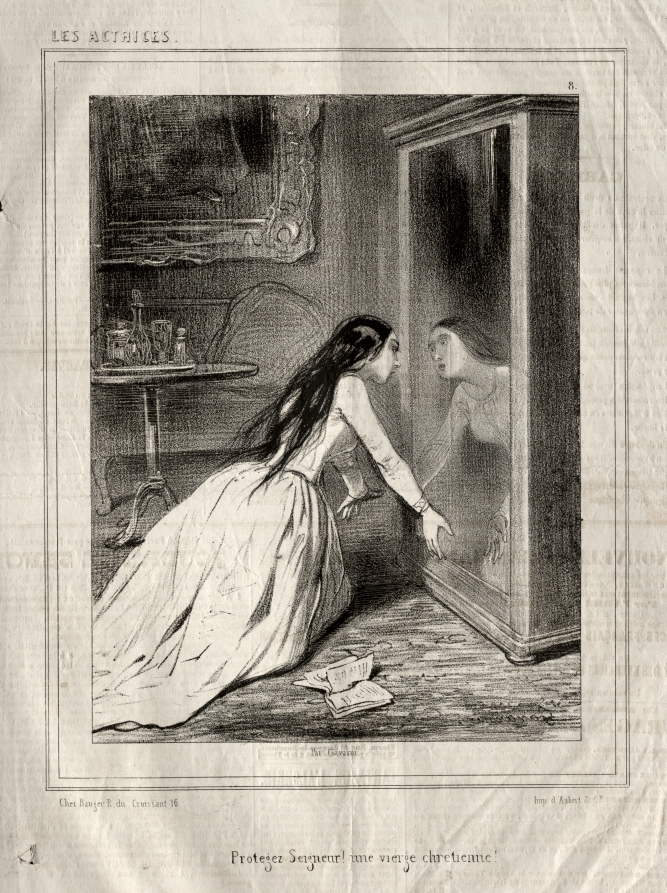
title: Les Actrices: Protegez Seigneur! un vierge chrétienne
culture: France, 19th century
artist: Paul Gavarni (French, 1804–1866)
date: 1843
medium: lithograph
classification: Print